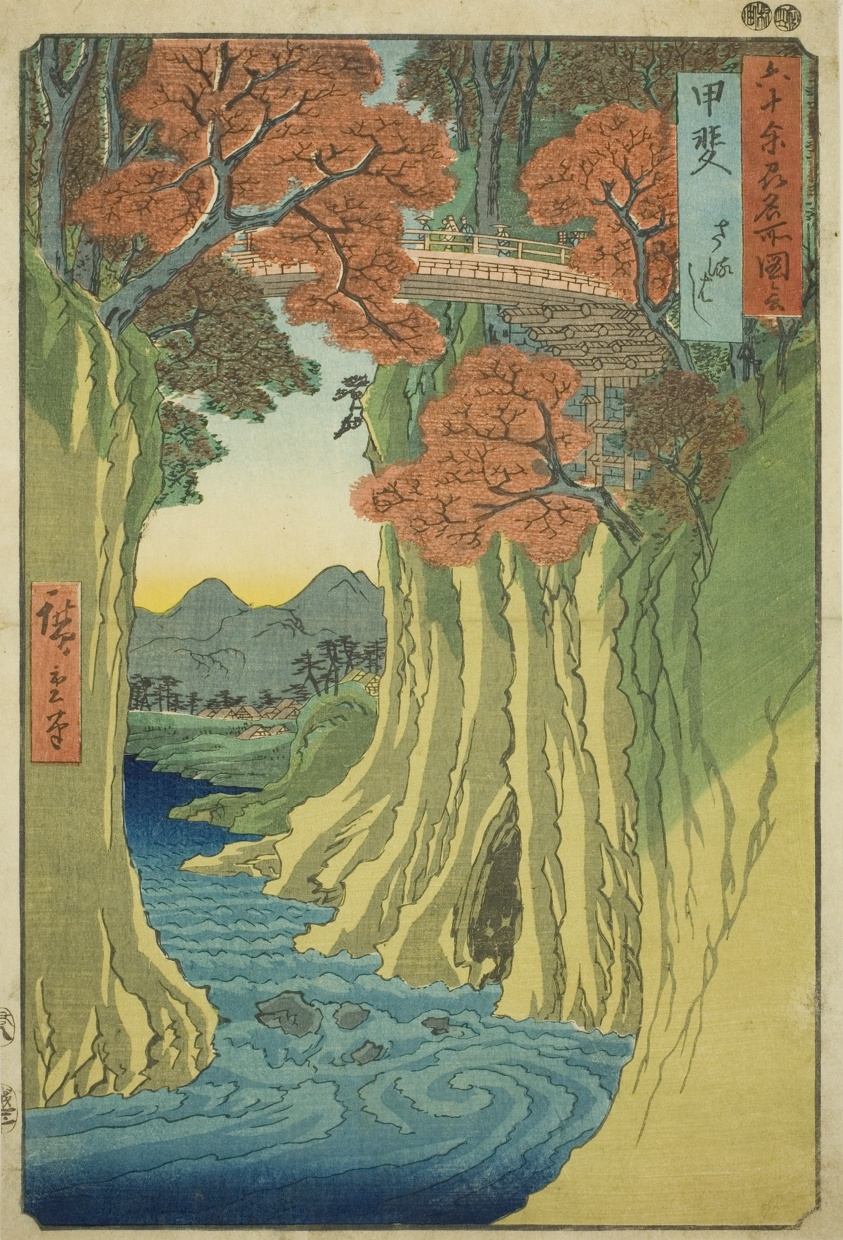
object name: Print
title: Kai Province: Monkey Bridge (Kai, Saruhashi), from the series "Famous Places in the Sixty-odd Provinces (Rokujuyoshu meisho zue)"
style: Japanese (culture or style)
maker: Utagawa Hiroshige 歌川 広重; Japanese, 1797-1858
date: 1853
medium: Color woodblock print; oban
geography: Japan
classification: woodblock print; print; asian art